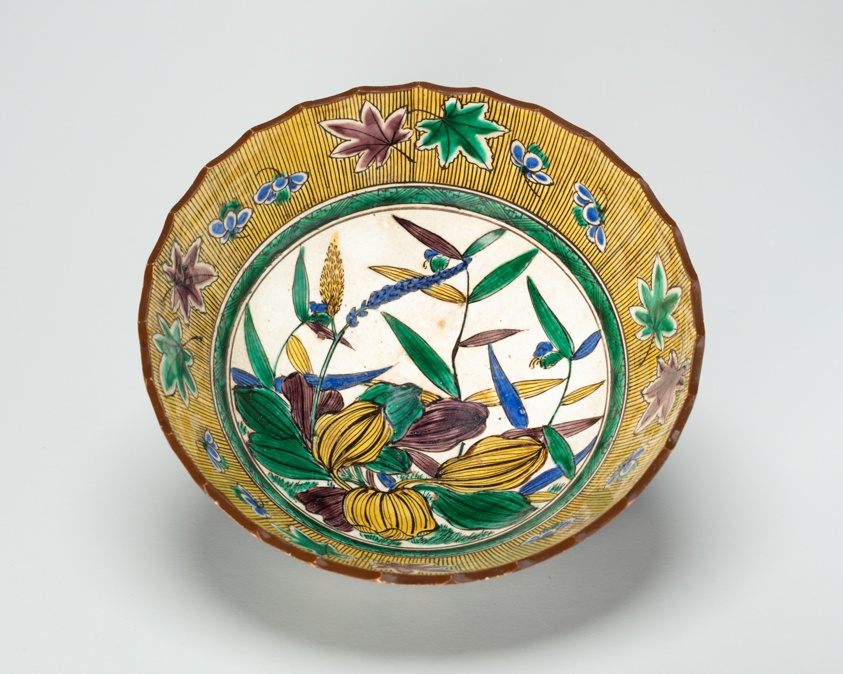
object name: Decorative Arts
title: Kutani-Style Sweets Tray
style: Japanese (culture or style)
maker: Japan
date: c. 1825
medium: Porcelain with underglaze decoration and overglaze enamels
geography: Japan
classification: stoneware; asian art; ceramics; decorative arts